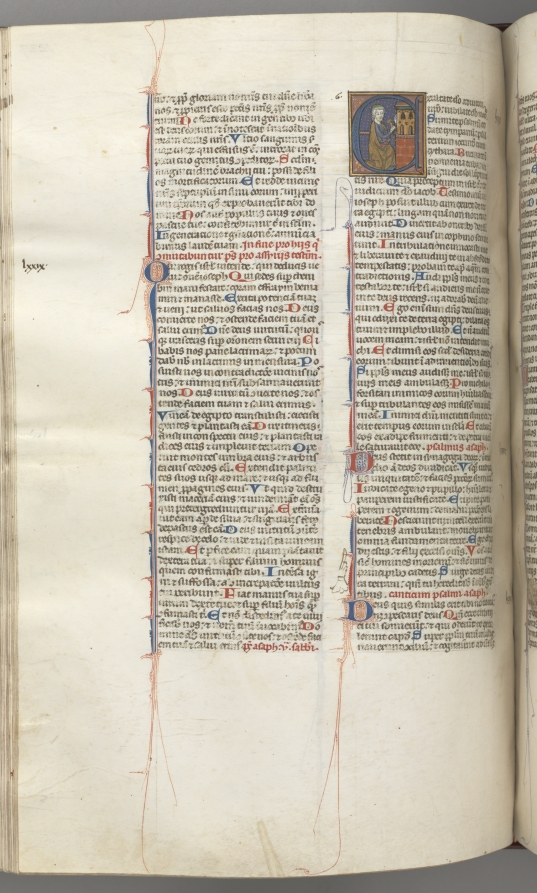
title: Fol. 227v, Psalm 80, historiated initial E, David hitting a carillon of hells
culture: Southern France, Toulouse(?), 13th century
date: c. 1275–1300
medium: ink, tempera and gold on vellum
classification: Bound Volume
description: Biblical manuscripts were highly prized and important possessions of churches, monasteries, cathedral schools, and universities throughout medieval Europe. The biblical texts were known as the vulgate, the translations made by Saint Jerome in the fourth century from Hebrew and Greek into Latin, which became the definitive and official Latin version of the Roman Church. In the 13th century, the bible was, for the first time, produced as a single volume with an officially sanctioned sequence to its books and chapters as illustrated by this example. The very extensive decoration of this bible is arranged hierarchically to indicate the relative importance of the various texts so that full or almost full-page initials mark the openings of the first prologue, Genesis, and the first Gospel; historiated initials mark the beginning of each book and illuminated initials mark the Prologues.